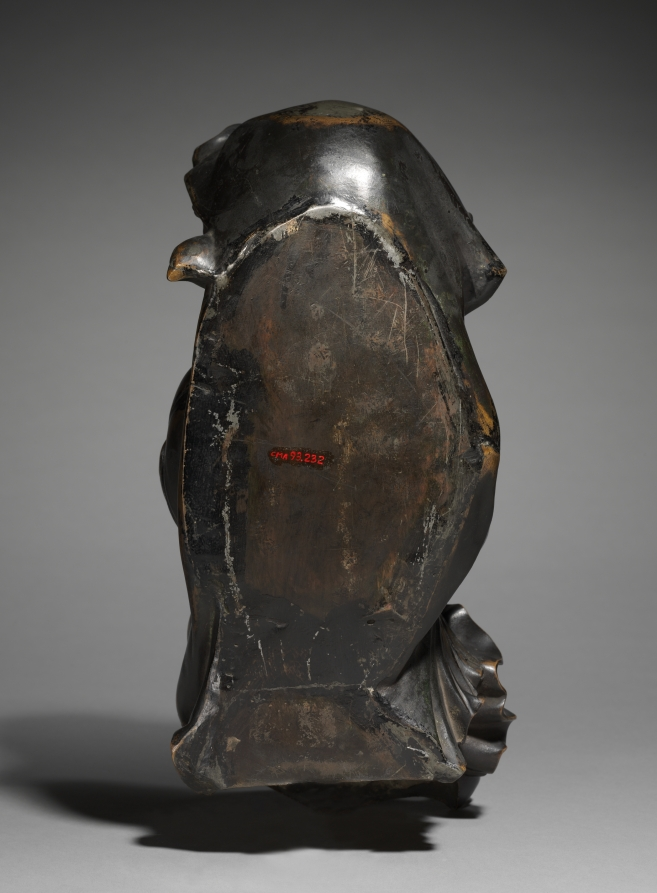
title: Winter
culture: France, 19th century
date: 1800s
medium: bronze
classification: Sculpture